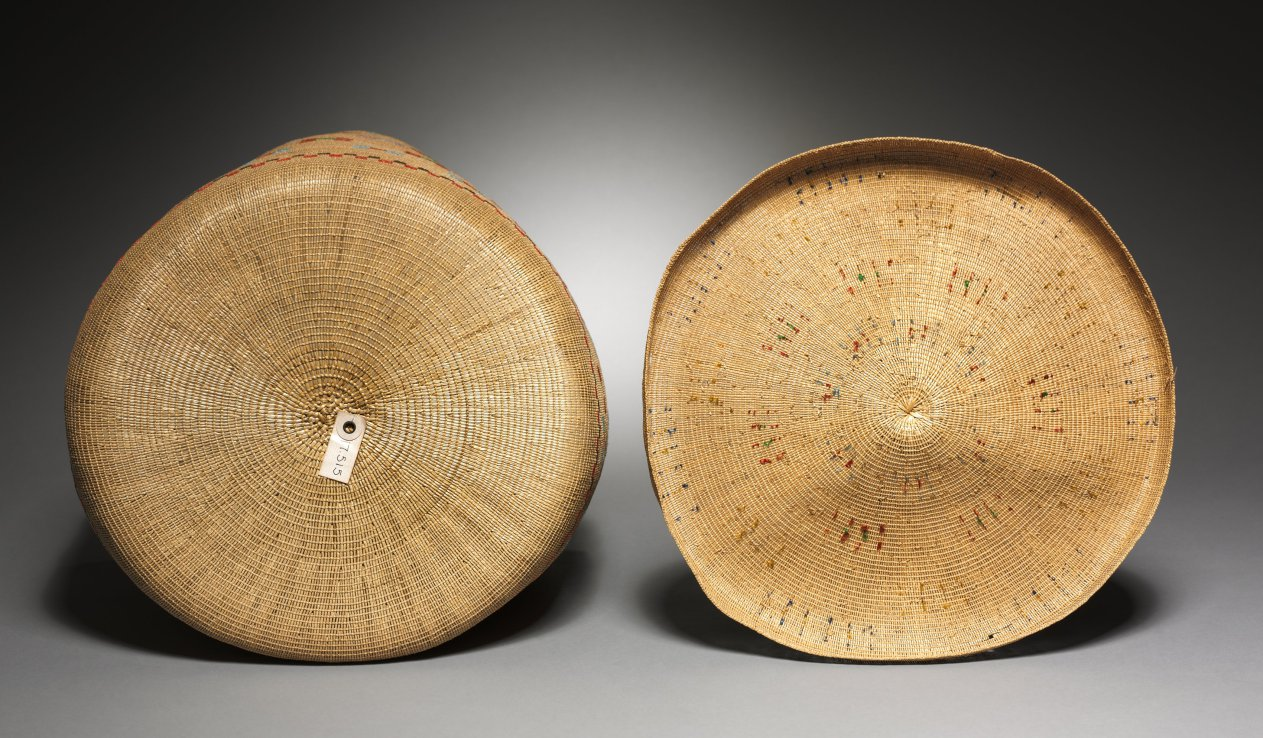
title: Covered Twined Cylindrical Basket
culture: Arctic. Aleut (Attu), late 19th-early 20th century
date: late 1800s–early 1900s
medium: twined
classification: Basketry